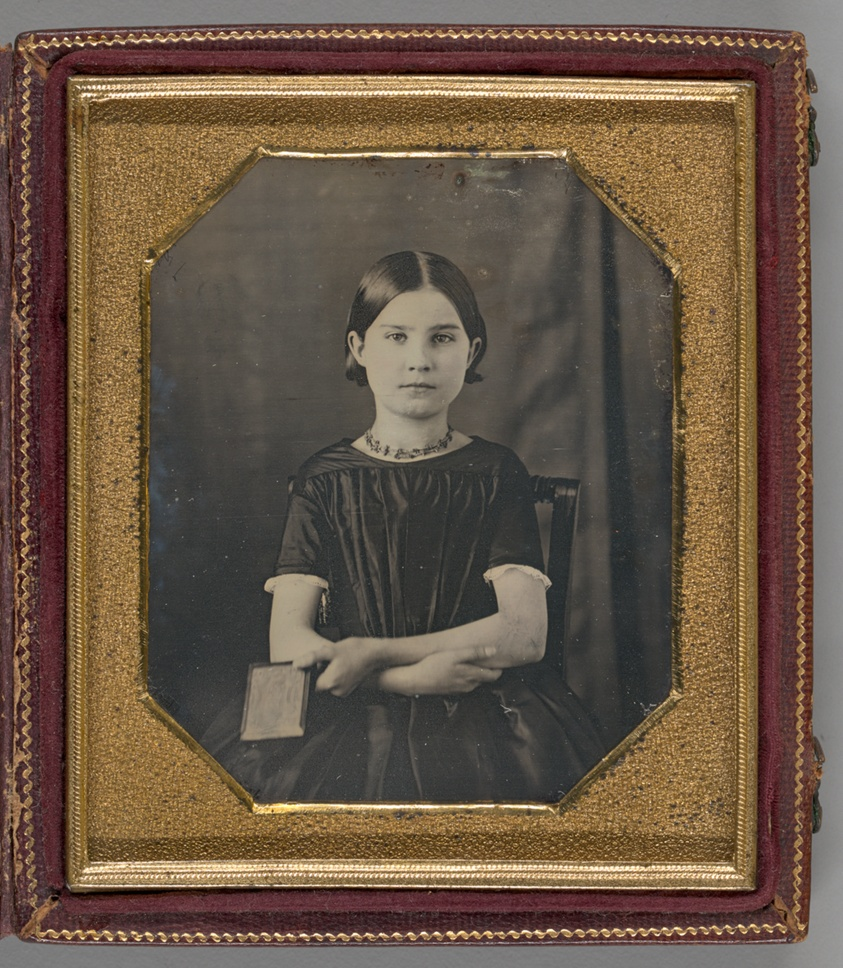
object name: Photograph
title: Untitled (Young Girl Holding Photograph)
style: 19th century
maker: Artist unknown; 19th century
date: 1839/99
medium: Daguerreotype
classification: photography; photograph